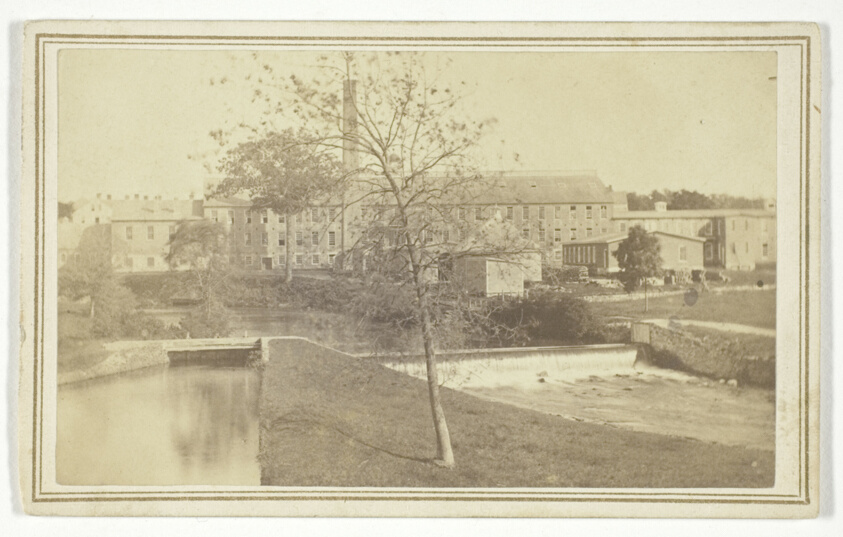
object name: Photograph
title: Untitled (river with falls and factory building)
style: 19th century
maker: T. Holmes (American, 19th century)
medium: Albumen print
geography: United States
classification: photographic process; photography; card photographs; photograph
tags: Collected by Hugh Edwards